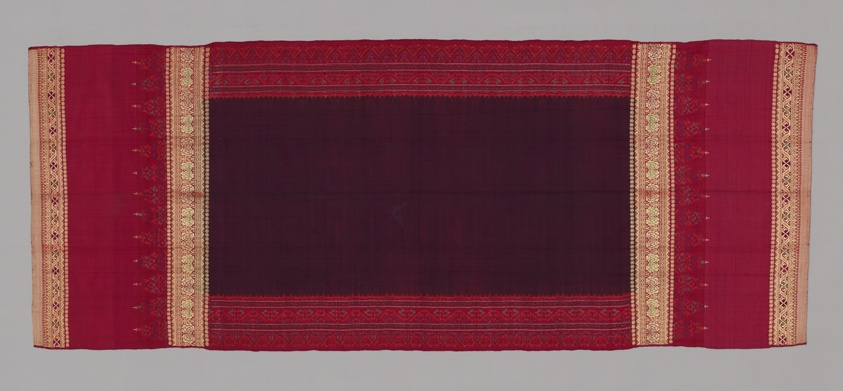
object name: Costume and Accessories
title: Woman's Shoulder Cloth (Selendang limar)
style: indonesian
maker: Indonesia, Sumatra, Palembang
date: 19th century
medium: Silk and gold-leaf-over-lacquered-paper-strip wrapped silk, warp and weft resist dyed (warp and weft ikat) plain weave with supplementary patterning and brocading wefts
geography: Sumatra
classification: weaving - printed; costume